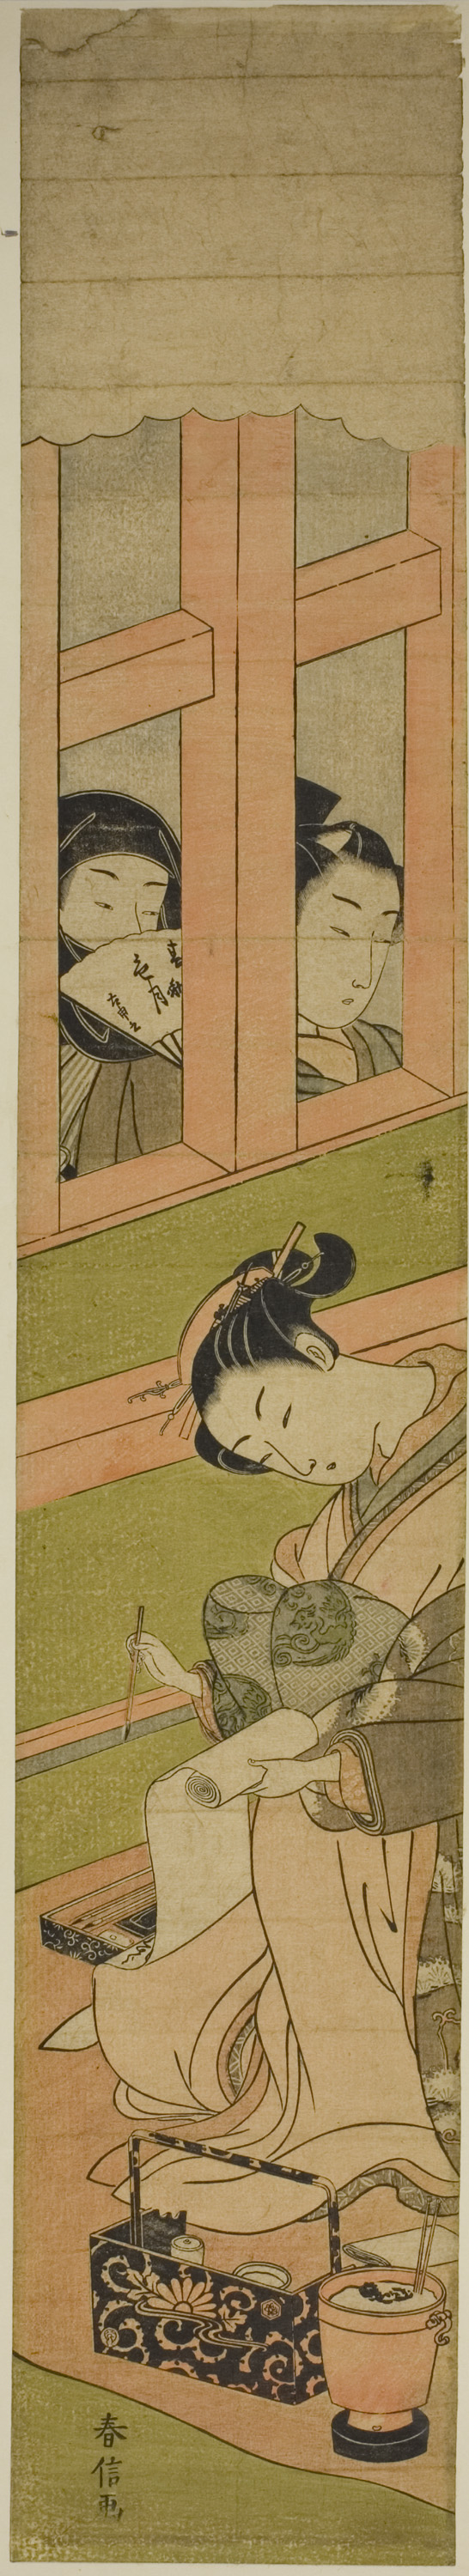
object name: Print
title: Courtesan Writing a Letter as Two Men Watch through a Window Lattice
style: Japanese (culture or style)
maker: Suzuki Harunobu 鈴木 春信; Japanese, 1725 (?)-1770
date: c. 1769/70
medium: Color woodblock print; hashira-e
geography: Japan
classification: woodblock print; print; asian art